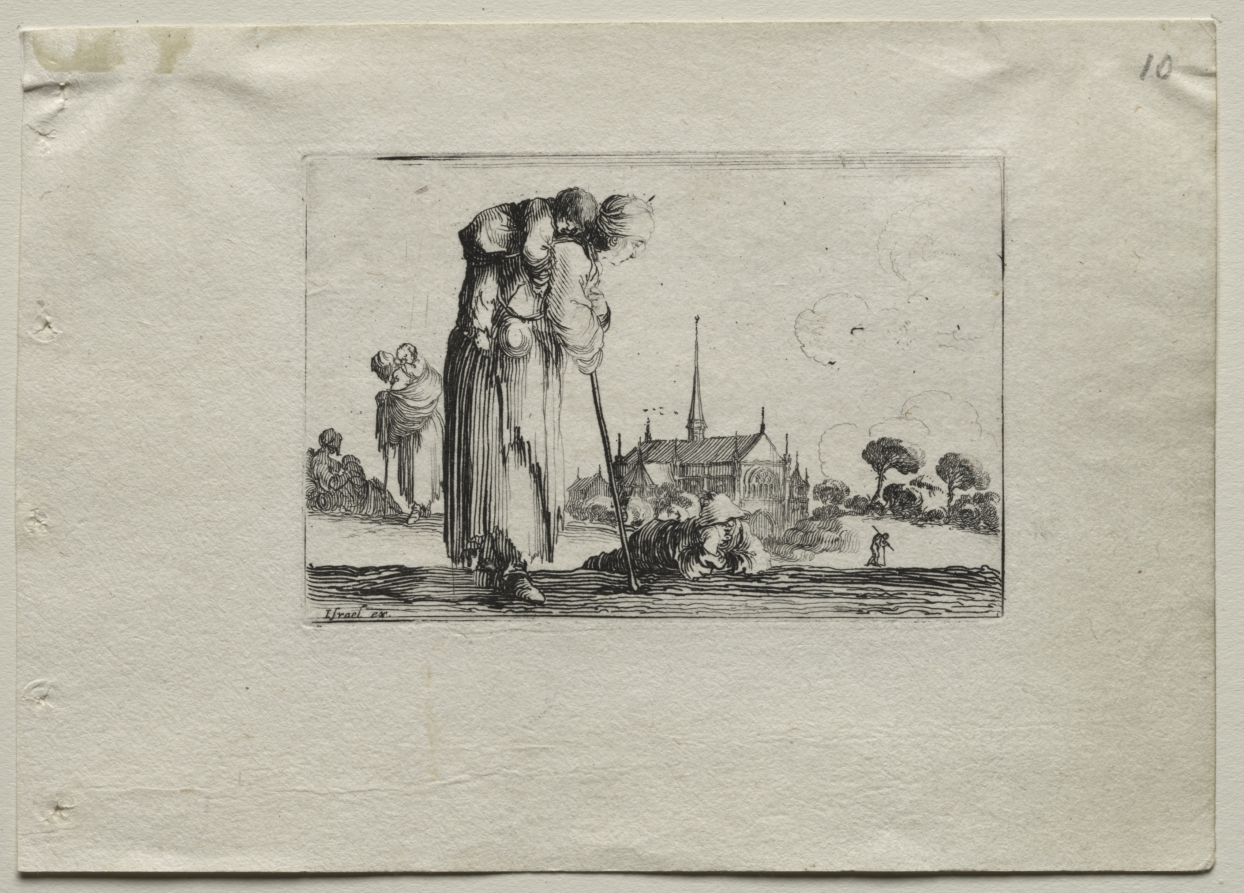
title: Caprices: Standing Beggar Woman Carrying a Child on her Back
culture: Italy, 17th century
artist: Stefano Della Bella (Italian, 1610–1664)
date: c. 1642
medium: etching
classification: Print